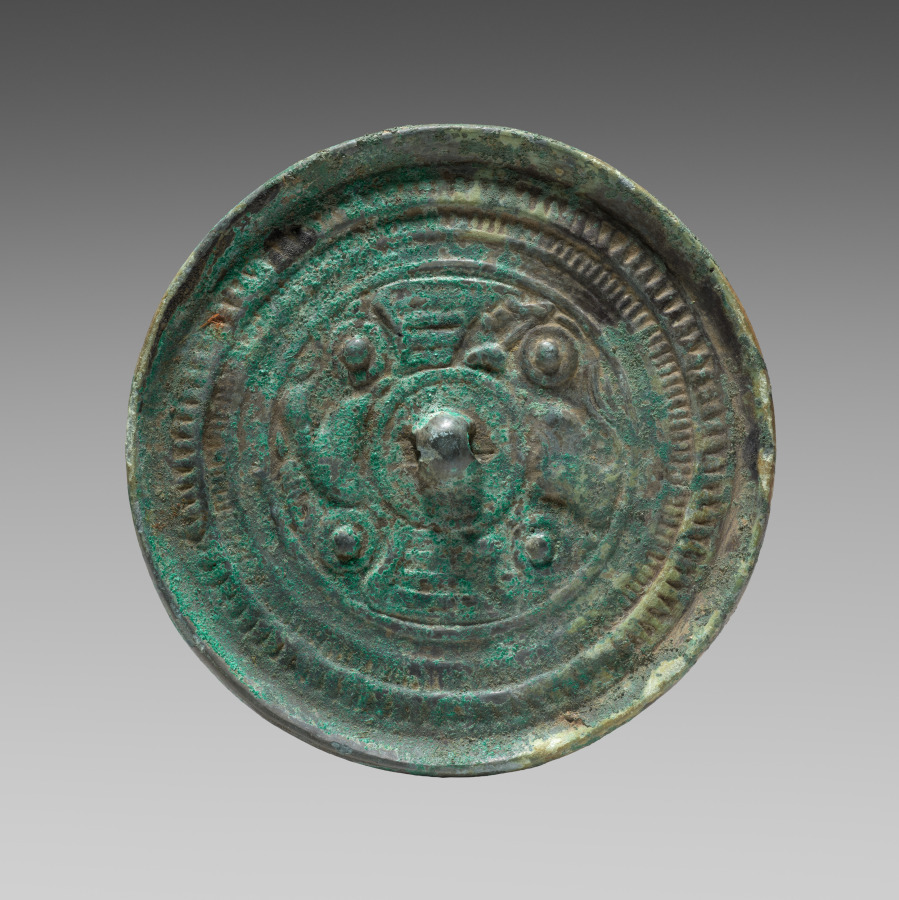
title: Mirror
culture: Korea, Goryeo dynasty (918–1392)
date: 918–1392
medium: bronze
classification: Metalwork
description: From ancient times, a mirror assumed various roles; a ritualistic tool, a diplomatic gift, and a luxury commodity. During the Goryeo dynasty (918-1392), which saw the great advancement of metallurgy, the royal court was the center of distributing sophisticated bronze artifacts. According to historical records, on the 7th day of the Lunar New Year, the king bestowed a bronze mirror inscribed with auspicious symbols upon each court official as part of a ceremony to celebrate the Day of Humans. This explains why a large quantity of bronze mirrors were excavated from elite tombs.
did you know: Due to its origin as an important tool in religion and politics, mirrors are often mentioned in many Korean proverbs that warn certain behaviors.